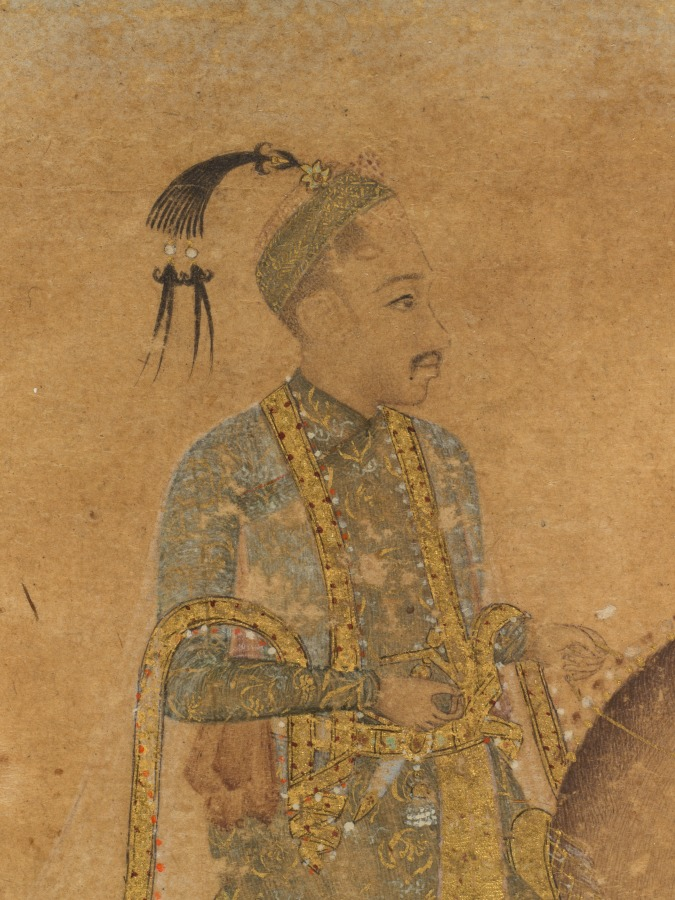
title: Sultan Abdullah Qutb Shah (1614-74) on Horseback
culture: Southern India, Golconda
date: c. 1635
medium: Ink, watercolor, and gold on paper, mounted with gold-sprinkled borders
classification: Painting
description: Sultan Abdullah Qutb Shah came to the throne of Golconda at the age of twelve and ruled until 1635 when the Mughal emperor Shah Jahan invaded the Deccan. Although Sultan Abdullah Qutb Shah kept his position, he did so under conditions named by Shah Jahan that included the payment of tribute money, conversion to Sunni Islam, and the presence of a Mughal political agent at the Golconda court. In this watercolor portrait, executed with subdued colors that complement the gold accents, the young Sultan wears a diaphanous shawl over his richly embroidered robe. His horse is almost as lavishly dressed in decorative trappings and jewels as his rider.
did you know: Specks of gold are sprinkled around the edges of this portrait.